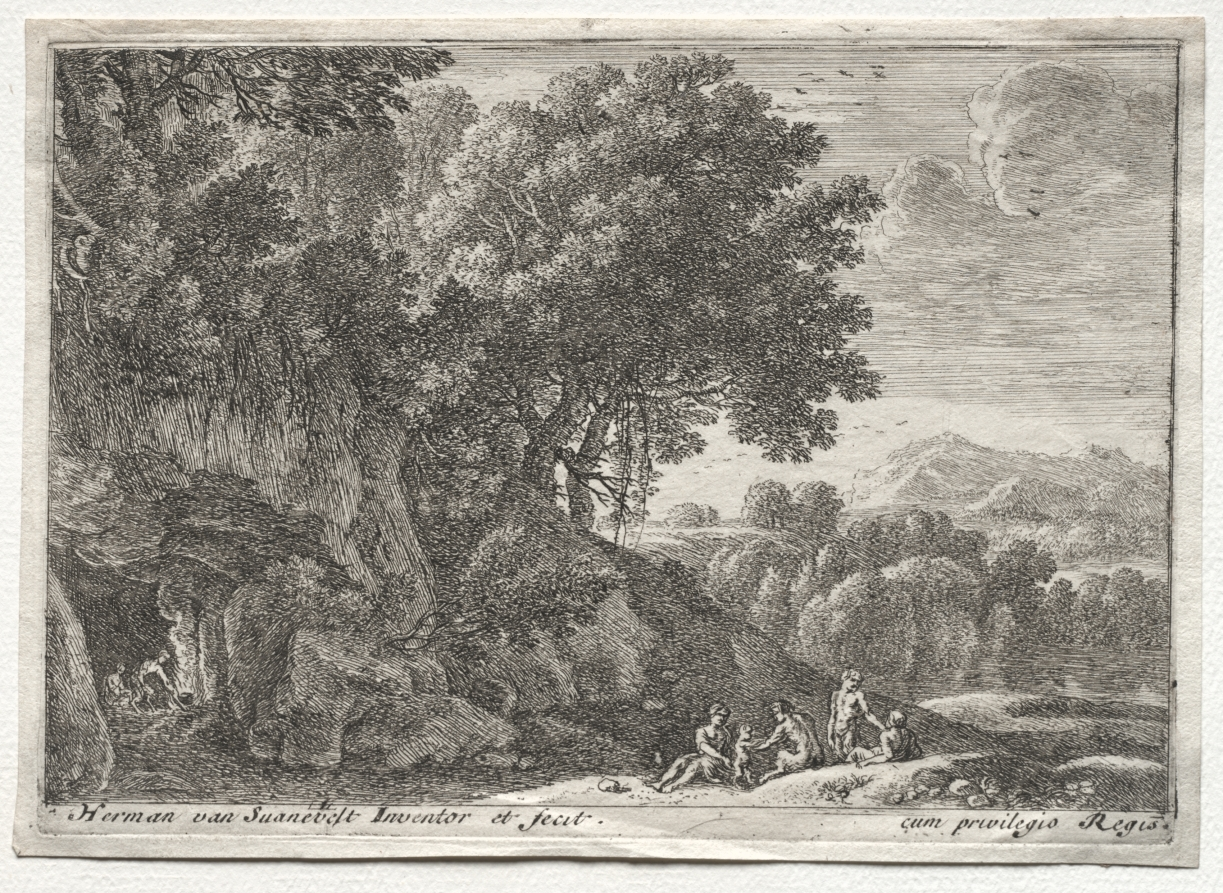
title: Landscape with Satyrs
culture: Netherlands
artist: Herman van Swanevelt (Dutch, c. 1600–1655)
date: 1623–55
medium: etching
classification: Print